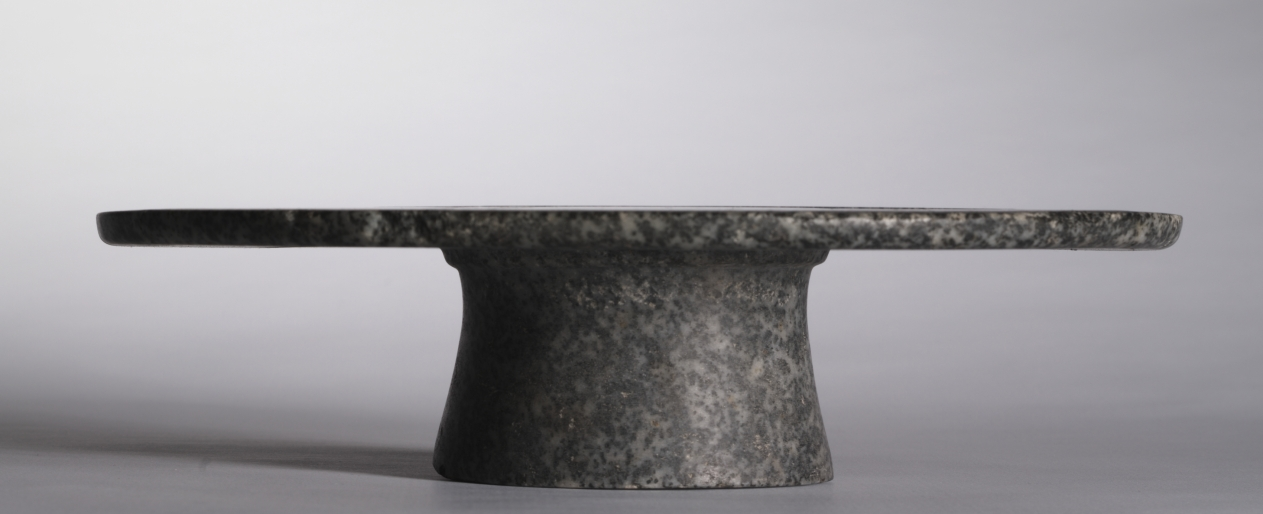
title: Offering Table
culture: Egypt, probably Saqqara, north of the Step Pyramid, excavations of J. E. Quibell, 1910-1911, Early Dynastic (2950–2647 BCE), Dynasties 2–3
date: 2770–2573 BCE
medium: anorthosite gneiss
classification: Vessels